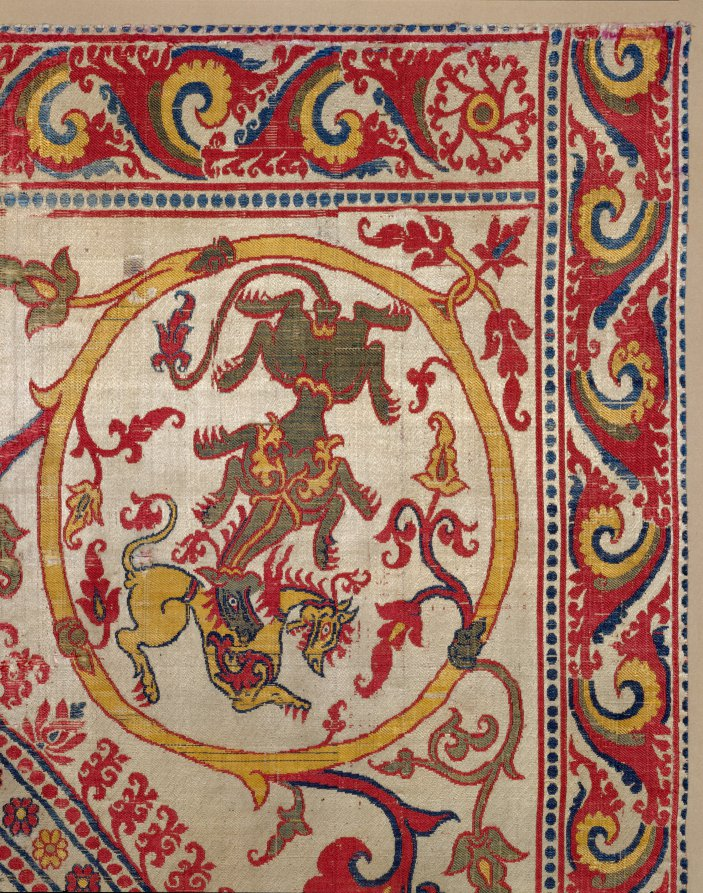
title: Lotus-blossom petal canopy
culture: Northern India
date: c. 1600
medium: silk: lampas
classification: Textile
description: The ceilings of sacred spaces throughout India were carved or painted with concentric circular lotus patterns; many also included textile canopies with the same designs. This exceptionally large example was woven in one complete section on a single loom. In India, the full-blown lotus flower bears solar connotations. It projects the radiance of a sacred or royal presence below. The motif of a dragon bearing down on a winged lion in each of the four corners indicates the designer’s recognition of a motif popular across Islamic Asia, from Turkey to Iran and Mughal India.